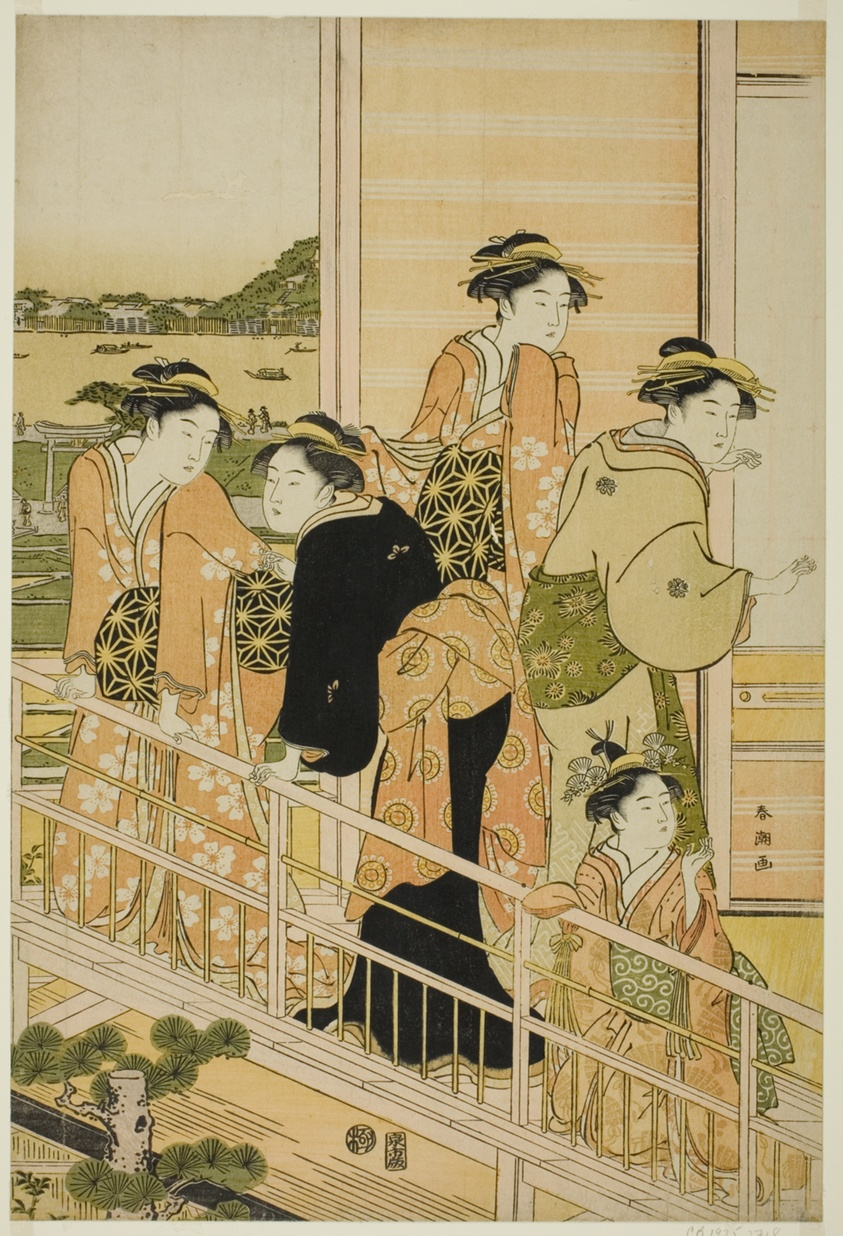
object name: Print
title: Women on a Balcony of a Yoshiwara Teahouse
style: Japanese (culture or style)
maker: Katsukawa Shuncho; Japanese, active c. 1780-1801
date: c. 1780s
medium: Color woodblock print; left sheet of oban triptych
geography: Japan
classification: woodblock print; print; asian art